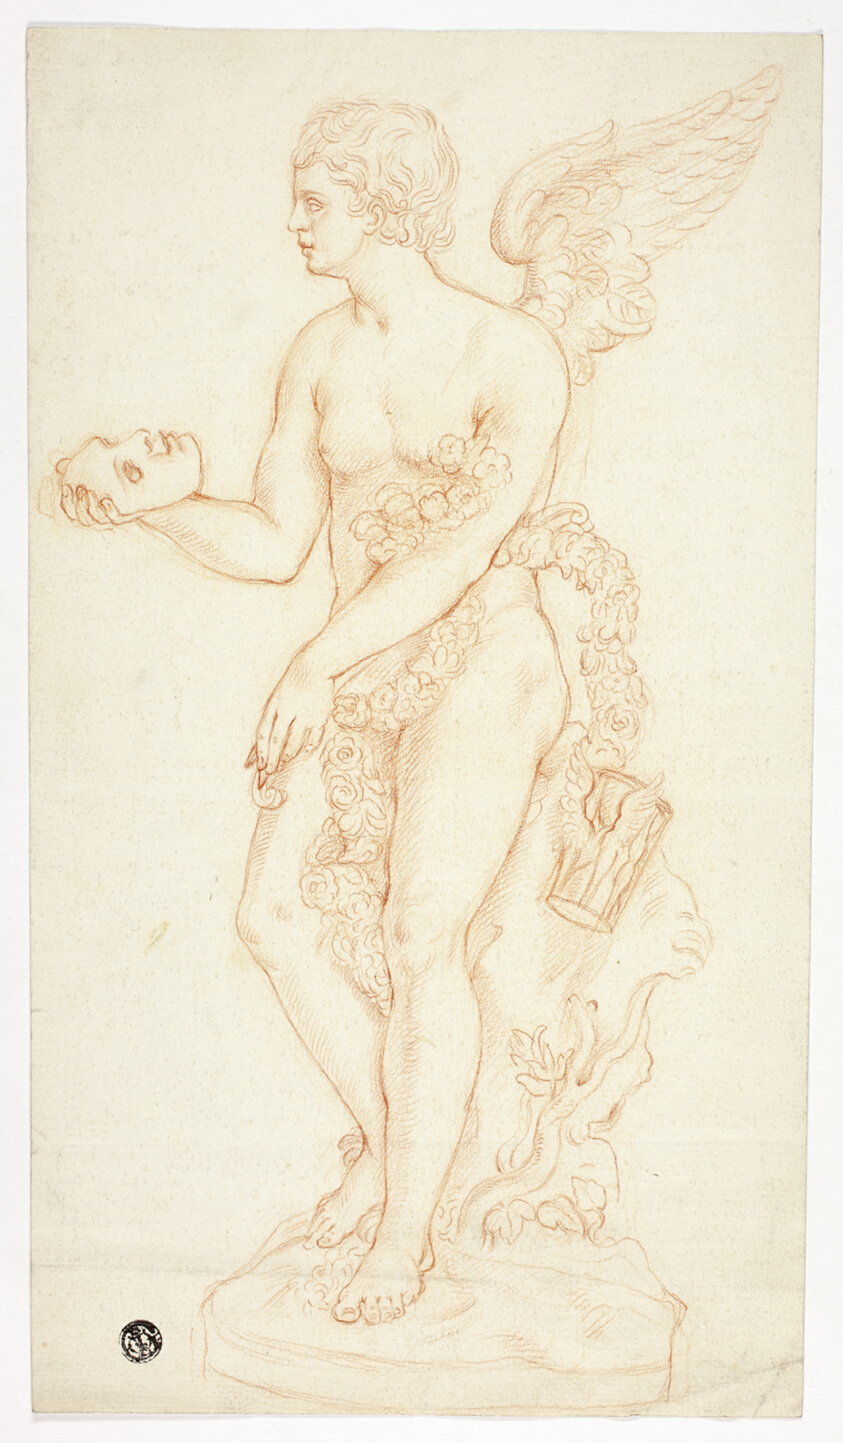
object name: Drawing and Watercolor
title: Statue of Cupid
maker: Unknown artist (possibly 18th century)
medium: Red chalk on ivory laid paper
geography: Unknown Place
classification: chalk; drawings (visual works); prints and drawing